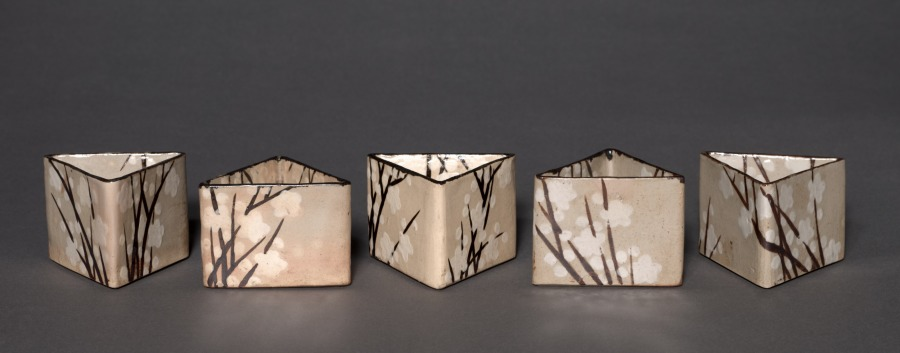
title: Set of Five Serving Bowls (Mukozuke) with Prunus Design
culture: Japan, Edo period (1615–1868)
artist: school of Ogata Kenzan (Japanese, 1663–1743)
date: 1700s-1800s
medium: Kyoto Ware: stoneware with underglaze iron oxide and slip decoration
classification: Ceramic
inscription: signature on bottom, 3 characters in brown iron.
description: Note the rough, tan, clay bodies of these bowls with their deliberate irregularities. The design of branches was first painted in a black iron oxide, then the blossoms and buds in a white slip, followed by the application of a very thin transparent overglaze.